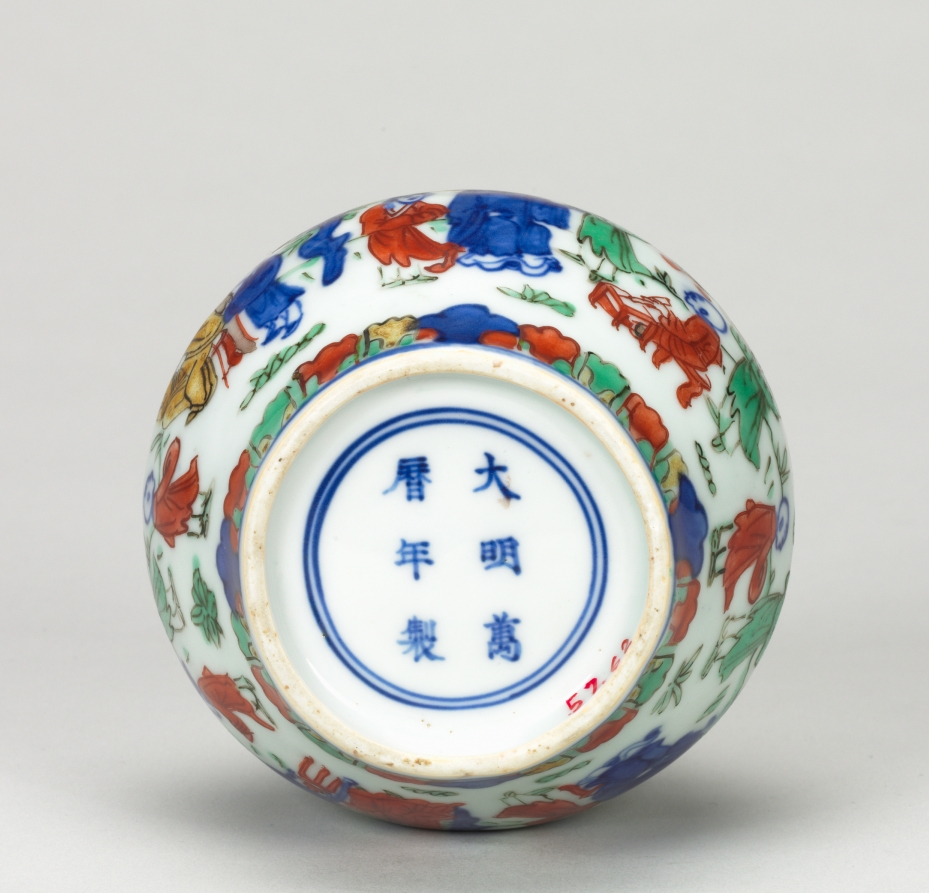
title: Covered Jar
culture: China, Jiangxi province, Jingdezhen kilns, Ming dynasty (1368-1644), Wanli reign (1573-1620)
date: 1573–1620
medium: porcelain with blue underglaze decoration and overglaze enamels in red, green, and yellow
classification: Ceramic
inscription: 大明萬曆年製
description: In the Ming (1368–1644) and Qing (1644–1911) dynasties, luxury items became more affordable to larger parts of the society, including women, merchants, and literati in non-official positions. Imperial patronage and a growing urban population encouraged consumption of luxury goods and local craftmanship. This covered porcelain jar has blue underglaze and overglaze in red, green and blue enamels. It shows Ming dynasty advancements in porcelain decoration and the creative mind of the talented artisans who made it.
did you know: This jar is painted with 16 figures of all ages enjoying a garden setting.